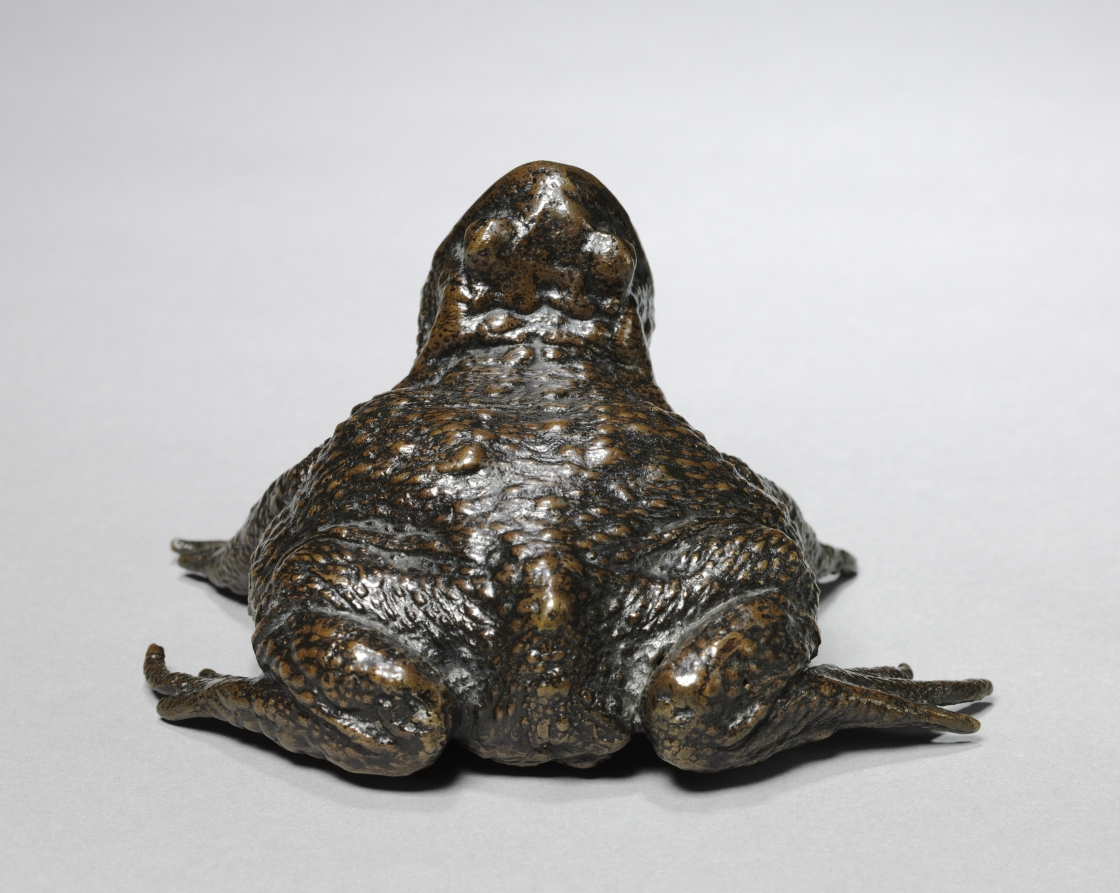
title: Toad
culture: Italy, possibly Padua, 16th century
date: c. 1500–1550 or later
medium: bronze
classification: Sculpture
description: Casting animals from life was a common Renaissance practice, connected to scholars’ interest in natural history and a taste for oddities. Drowning the toad in ammonia left the animal’s body intact. The workshop then manipulated the head, opened the mouth, and cast the creature as a functional object for the study.